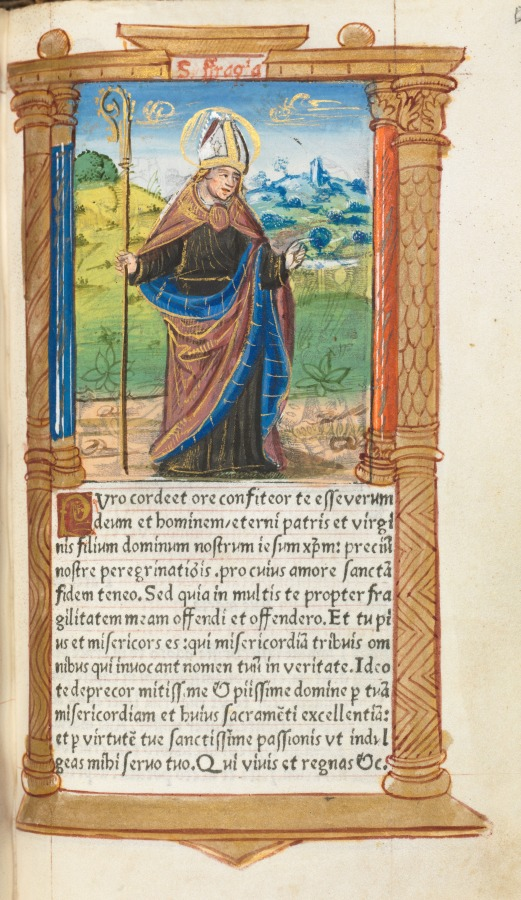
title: Printed Book of Hours (Use of Rome): fol. 96r, St. Augustine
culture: France, Paris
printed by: Guillaume Le Rouge (French, Paris, active 1493–1517)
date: 1510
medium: 112 Printed folios on parchment, bound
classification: Bound Volume